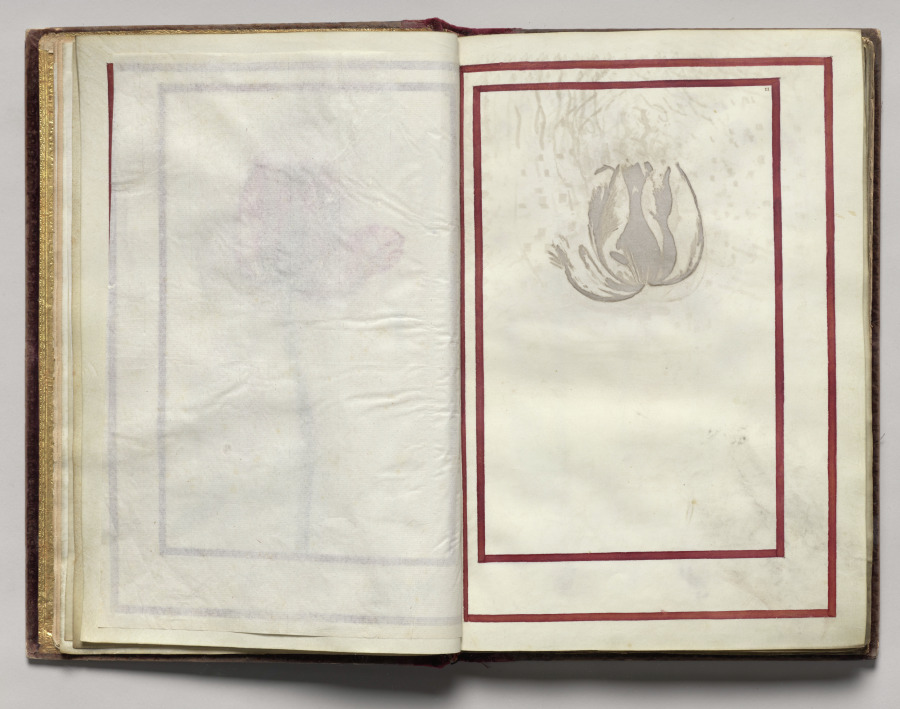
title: Border, folio 6 (recto), from Florilegium (A Book of Flower Studies)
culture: France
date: 1608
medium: watercolor, ink, silver and gold over occasional traces of pencil, on vellum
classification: Bound Volume